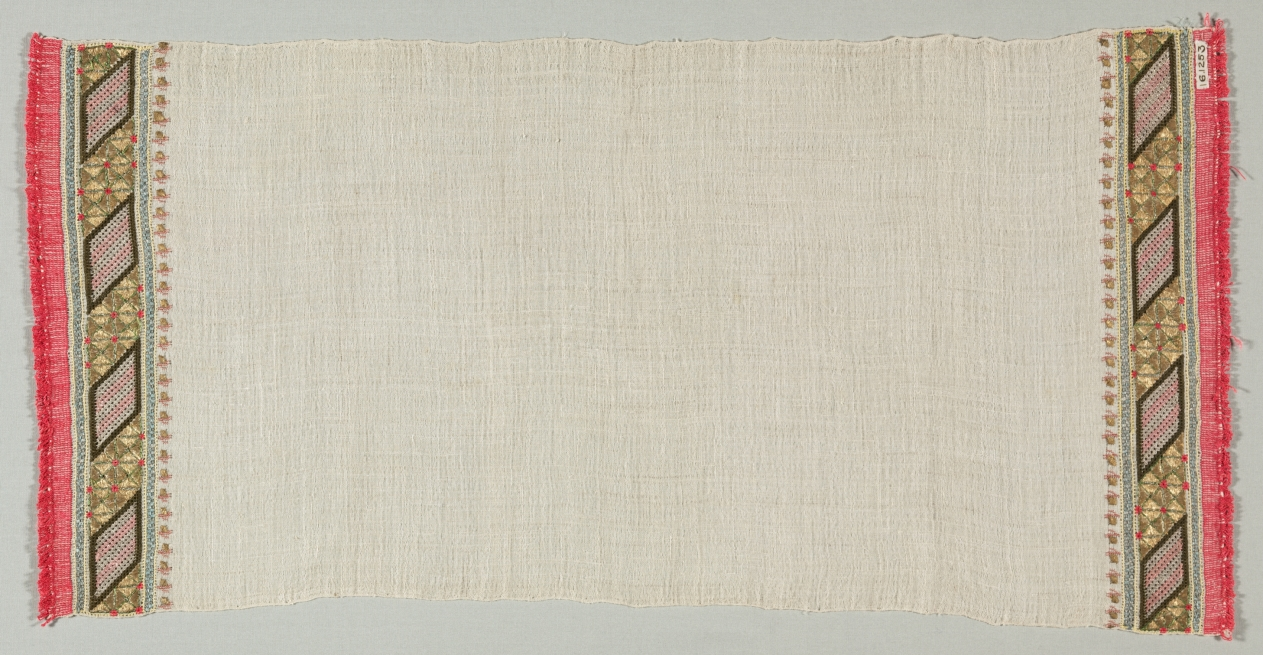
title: Embroidered Towel (Peshkir)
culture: Turkey, 19th century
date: 19th century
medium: embroidery; silk and silver filé on linen ground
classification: Embroidery